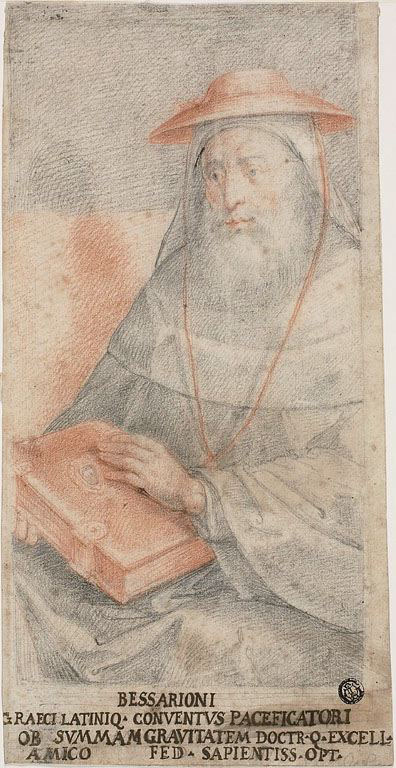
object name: Drawing and Watercolor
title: Bessarion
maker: Attributed to Federico Zuccaro; Italian, 1540/41-1609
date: c. 1560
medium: Red and black chalk on ivory laid paper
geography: Italy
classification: chalk; drawings (visual works); prints and drawing